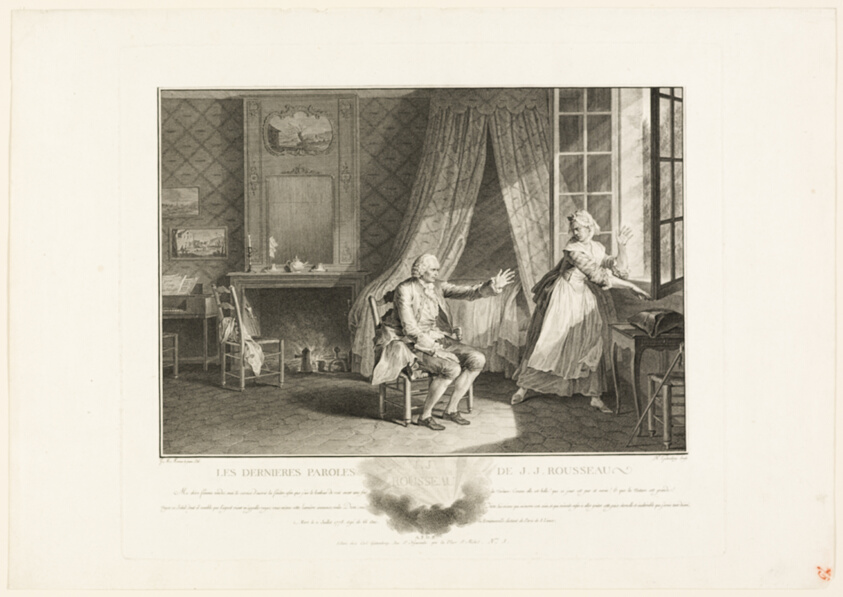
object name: Print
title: The Last Words of Jean Jacques Rousseau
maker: Heinrich Guttenberg (German, 1749-1818); after Jean Michel Moreau (French, 1741-1814)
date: 1775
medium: Engraving on laid paper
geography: Germany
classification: engraving; print; prints and drawing